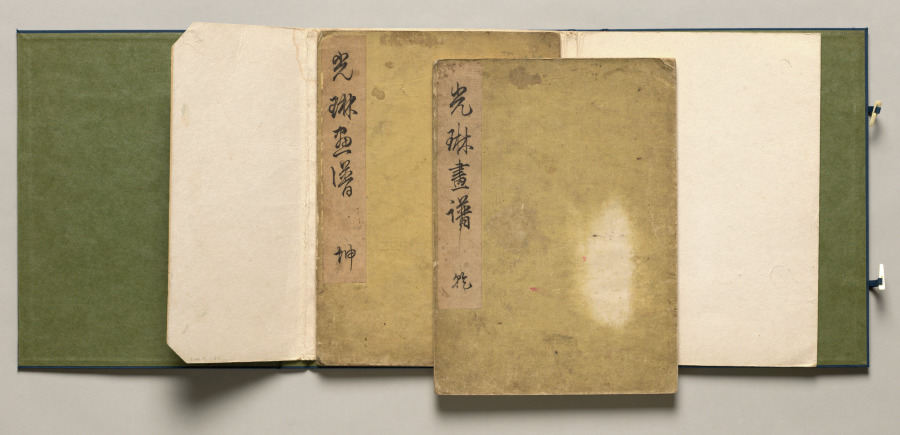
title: The Kōrin Picture Book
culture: Japan, Edo period (1615–1868)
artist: Nakamura Hōchū (Japanese, d. 1819)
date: 1800s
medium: Set of two woodblock printed folding-books; ink and color on paper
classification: Bound Volume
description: Nakamura Hōchū prized the design acumen of earlier painter Ogata Kōrin (1658–1716) and honored him with this two-volume set of woodblock printed images. While Hōchū sampled the original compositions from Kōrin’s works, the prints in these books are heavily inflected with his own loose, whimsical drawing style.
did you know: This set of books is in the orihon, or folding-book format.